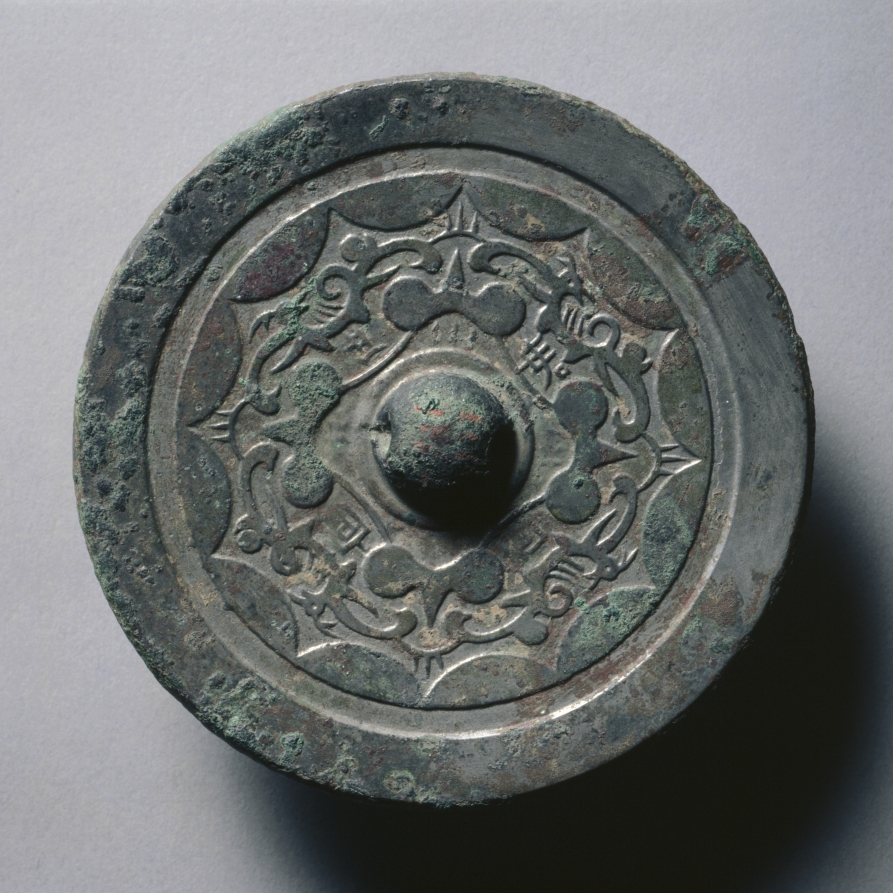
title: Mirror with Quatrefoil and Linked Arcs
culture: China, Eastern Han dynasty (25–220 CE)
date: 25–220 CE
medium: bronze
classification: Metalwork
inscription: 君宜官位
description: Inscription: You deserve an official post.